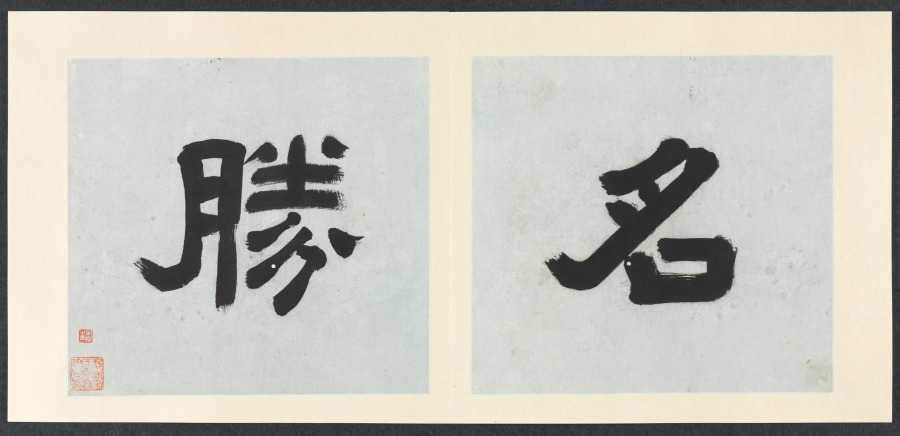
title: Eighteen Views of Huzhou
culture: China, Ming dynasty (1368–1644), Wanli reign (1573–1620)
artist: Song Xu (Chinese, 1525-c. 1606)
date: c. 1588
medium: Album of eighteen leaves; ink and color on silk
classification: Painting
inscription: 包陽湖：自此數里，東出太湖甚近。北至香山可數里。過此即宜興界矣。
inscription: 呂山滙：蓋呂蒙曾屋此而云然。亦弁山餘派也，入郡中必由此。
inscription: 道場山：郡城南去，可五六里，為伏虎禪師道場。上有伏虎亭、望湖亭。南可見武林諸山。北盡震澤群峯之勝。俯窺城郭樓臺，佳麗如畫。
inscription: 碧巖山：山多古木，寺藏其中。今為人侵伐殆盡，遂成荒廢，遊者鮮矣。然嶺崖飛瀑，不減清致。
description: By the 1500s, visits to historic and scenic sites in the lower Yangzi delta stimulated an increase of printed illustrated travel books. Topographical depictions of local scenery flourished. Leaves from this album illustrates sites around Lake Tai of the two adjacent counties Changxing and Wuxing (modern Huzhou). Song Xu, who lived intermittently in Jiaxing and Songjiang, must have passed through Wuxing by boat and thus knew the region. The paintings are inscribed with gazetteerlike notations, suggesting that the album was produced for clients as commemorative works, a travel guide, or for “armchair travel” (woyou) in one’s mind.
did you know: Song Xu favored a painting style that was technically polished and focused attention on specific, realistic details.